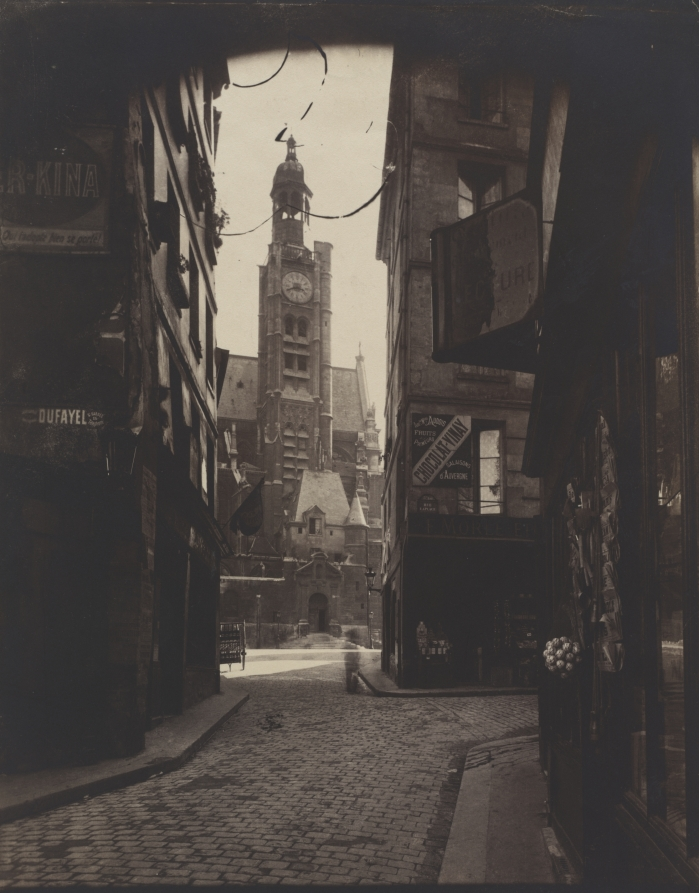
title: Rue de la Montagne-Sainte-Geneviève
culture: France, 20th century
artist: Eugène Atget (French, 1857–1927)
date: 1898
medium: albumen print, gold toned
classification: Photograph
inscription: Written in pencil on verso: "EA 8794-2"; "Rue de la Montagne-Sainte-Geneviève"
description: Eugène Atget became a photographer in the 1890s. His goal, like that of Charles Marville decades before, was to document the old buildings and streets of Paris before they were demolished. This narrow street, the site of the founding of the University of Paris in 1112, ends in a church built in the 1600s. Atget sold his photographs not as art but as “documents for artists,” similar in purpose to the nude studies other photographers made for use by painters. That may be why he photographed early in the morning, when a normally bustling street like this one was empty.